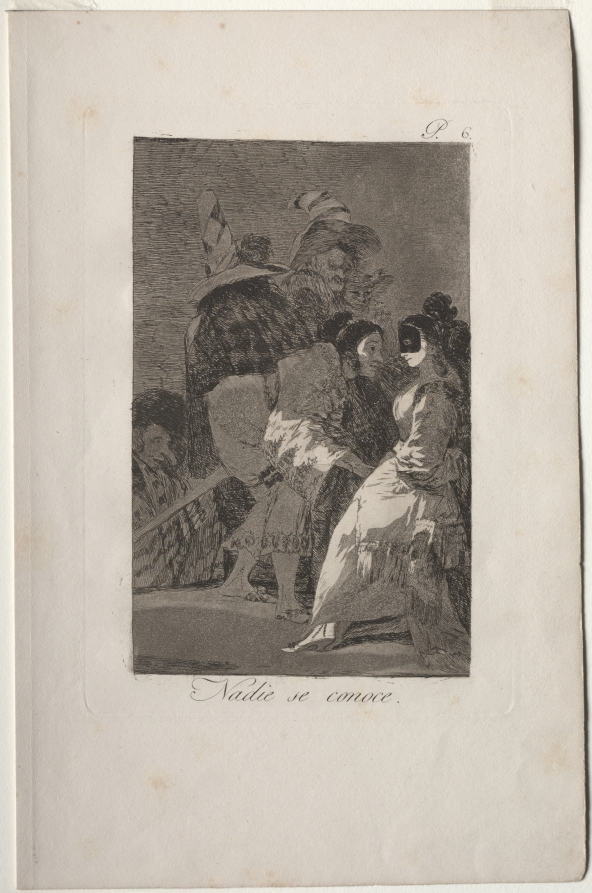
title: No One Knows Himself, Plate 6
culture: Spain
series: Los Caprichos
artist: Francisco de Goya (Spanish, 1746–1828)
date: 1799 (printed c.1855)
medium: etching and aquatint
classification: Print